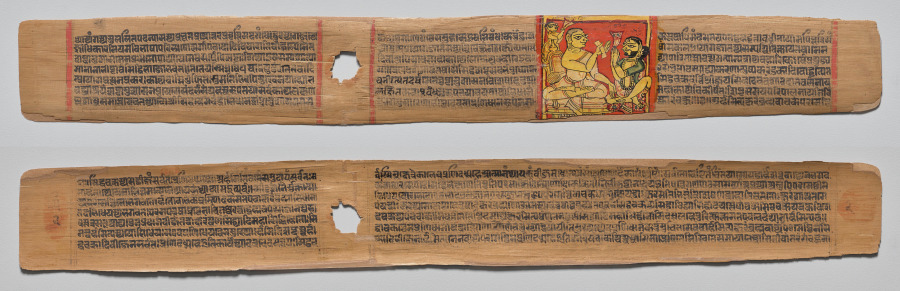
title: Folio 2, from a Great Poem about Twos (Dvyashraya Mahakavya) of Hemachandra with Commentary by Abhayatilaka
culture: Western India, Gujarat, possibly Patan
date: 1428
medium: gum tempera and ink on palm leaf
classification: Painting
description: The author of the text, Hemachandra (1088–1173) is seated at the left, on a throne. He was a Jain monk, here shown clad in a white robe, with shaven head, holding a cloth before his mouth to screen out any insects he might inadvertently harm by swallowing. Also an attribute of Jain ascetics, who adhere to principles of committing no harm to any living being, is the broom behind his back, used to sweep insects from the path. He wrote this text in 1160, illustrating points of grammar with praiseworthy deeds of his royal patrons, such as King Kumarapala (reigned 1143–1172) of the Solanki dynasty (940–1244) of western India who sits before him.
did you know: Two barely perceptible inscriptions identify the monk and the layman as Hemachandra and Kumarapala.